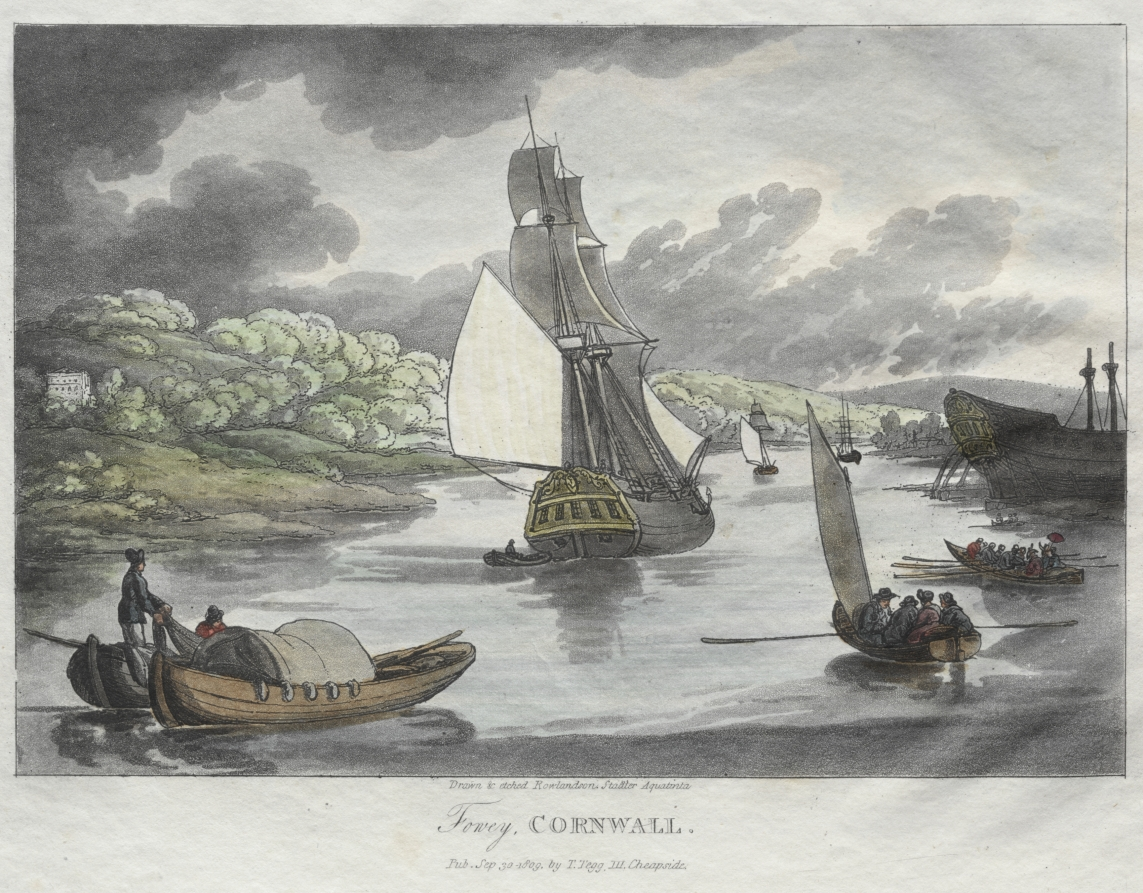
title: Rowlandson's Sketches from Nature: Fowey, Cornwall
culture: England, early 19th Century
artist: Thomas Rowlandson (British, 1756–1827)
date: 1809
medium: etching, hand colored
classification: Print